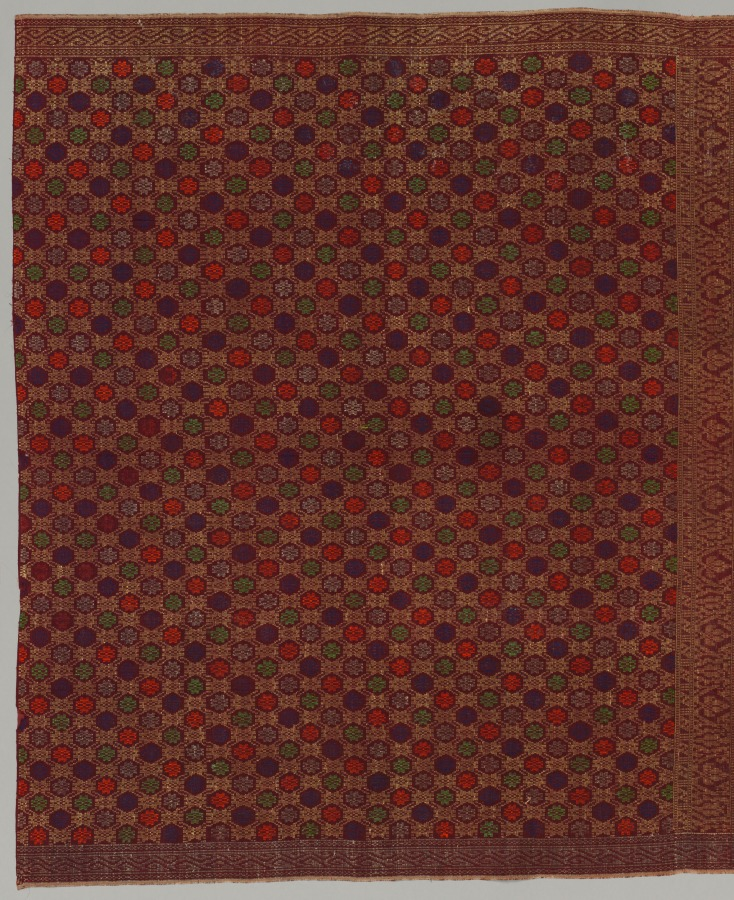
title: Wearing Cloth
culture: Indonesia, Sumatra, Palembang, 1st half 20th century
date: 1900–1950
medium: tabby weave; silk brocaded with silk and metallic threads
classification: Textile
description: The small pattern of rosettes in the main field, the selvage borders, and the tumpal (triangle) border are characteristic of the gold, silver, and red silk cloths woven in the Palembang region. Sumptuous silks of this type were only made in the eastern coastal cities of Sumatra that maintained active trade with China and India. Not only were the silk, gold, and silver threads imported, but the elements of the design were derived from Indian patola (warp and weft ikat) silks. Traditionally, cloths like this were worn for ceremonial occasions and were also used in the exchange of gifts required on the occasion of a wedding.